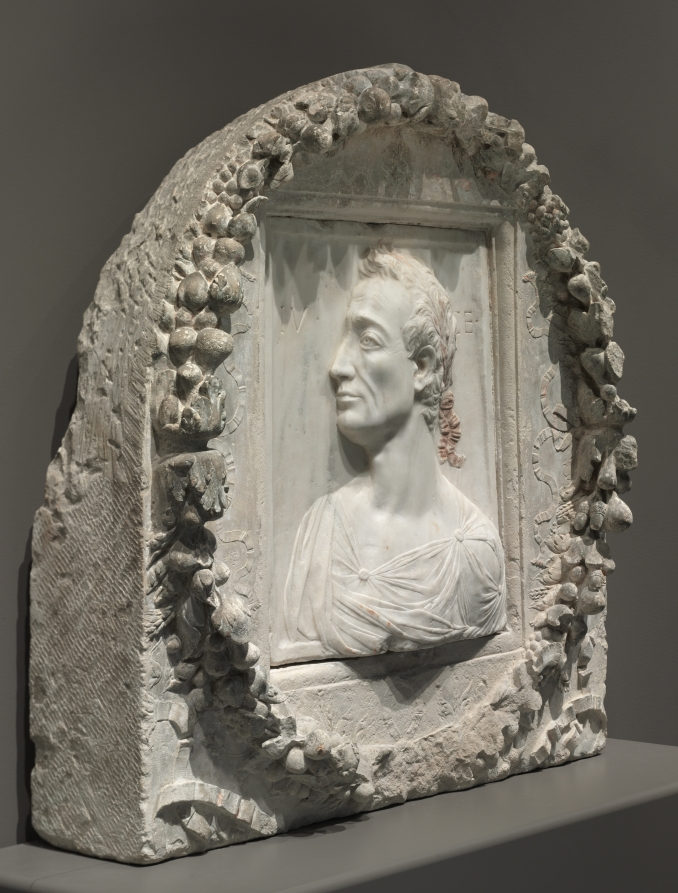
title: Julius Caesar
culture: Italy, Florence, 15th century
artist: Mino da Fiesole (Italian, c. 1430–1484)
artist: garland by Mino da Fiesole and Workshop (Italian, c. 1430–1484)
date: c. 1455–60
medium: marble with traces of bole (red clay) and limestone with traces of paint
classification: Sculpture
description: Renowned Roman general and statesman Julius Caesar (100–44 BCE) appears here as a political rather than military leader, worn by the burdens of office, with carefully described signs of aging. Mino probably used ancient coins from the collection of the Medici, Florence's ruling family, as his starting point for this sculpture. However, the complex carving, the clinging drapery, and the psychological intensity all characterize the inventiveness Renaissance artists brought to classical subject matter. In this case, Caesar offered an important model for leadership, masculinity, and composure. The garland is clearly by a different hand, but passages, such as the ribbons and flowers in low relief, correspond to details found in other decorative carvings from Mino's workshop. Initially, the limestone setting was probably put into a wall, perhaps in a lunette over the door, from which it was later removed. However, the relationship between the garland and the relief has not yet been clarified and is the subject of ongoing research.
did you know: Traces of paint on this white marble relief indicated that it was once brightly painted.